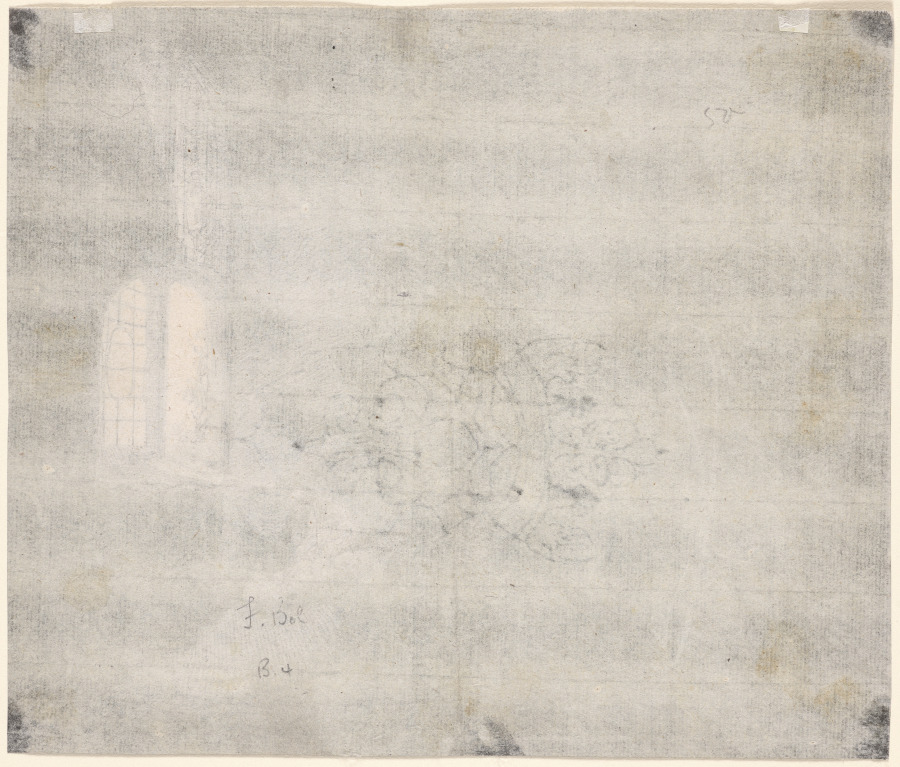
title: The Holy Family in an Interior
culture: Netherlands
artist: Ferdinand Bol (Dutch, 1616–1680)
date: 1643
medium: etching, drypoint and engraving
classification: Print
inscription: Watermark: Strasbourg Lily (close, but not identical to Hinterding A-L’-b, Ill. Vol. 3, p. 395)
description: Ferdinand Bol made this etching just one year after he left the studio of his famous teacher, Rembrandt van Rijn, adopting his master’s motif of a dark domestic interior as the setting for a biblical scene. Here, Mary, Joseph, and Jesus sit within a contemporary Dutch interior with the light from a window the sole source of illumination, revealing an open book at a small desk. The rest of the room is in deep shadow. As Mary nurses the child, Joseph stands by with a swaddling cloth. To their left is a curtained cupboard bed of the type commonly found within Dutch living rooms, a bassinet, a nursing basket set on its end, a chair, and various vessels and containers. To the right of the family is a hearth and the barely discernible cat, calmly watching the scene. Bol’s broad, meshed lines simultaneously darken the room and reveal the various, closely observed domestic objects related to caring for an infant.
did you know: The tall basket laid on its end visible in this composition is a bakermat, a legless couch typical in 17th-century Netherlands that was placed on the floor for nursing.